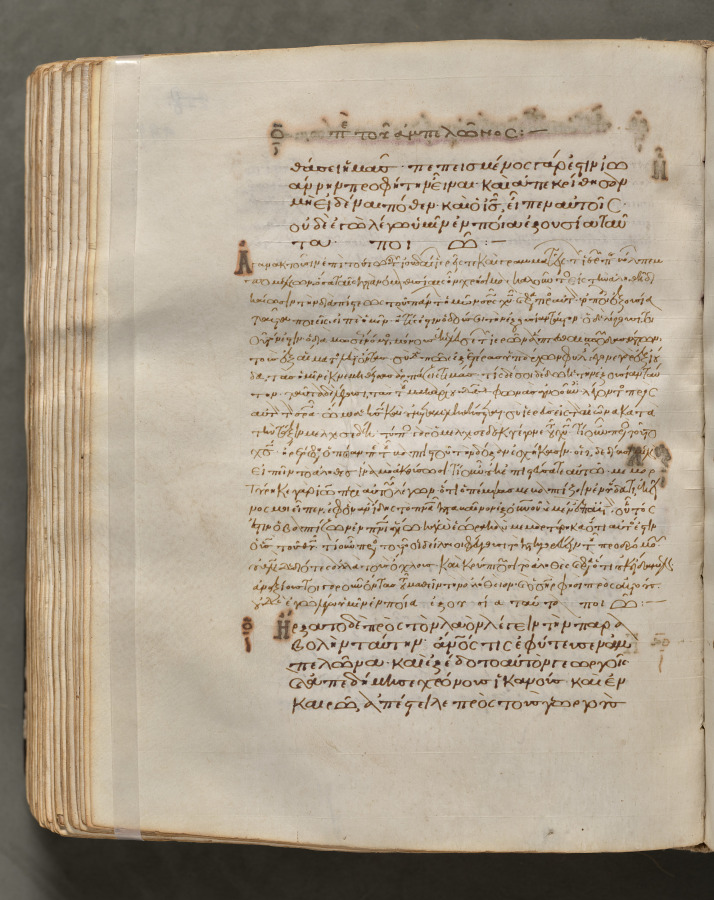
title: Text, folio 299 (verso), from a Gospel Book with Commentaries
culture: Byzantium, Constantinople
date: c. 1000–1100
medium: ink, tempera, and gold on vellum; leather binding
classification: Bound Volume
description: Each of the four gospels in this book opens on a page with brilliantly illuminated borders depicting the author of the text as well as birds—principally peacocks, symbols of the immortality of the soul—and fountains, representing the fountain of life and the salvation of the soul. This volume consists of 428 leaves with texts in Greek. Its level of sophistication suggests that it was probably written and decorated in a monastery in Constantinople.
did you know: Gospel books were carried in procession through Byzantine churches.